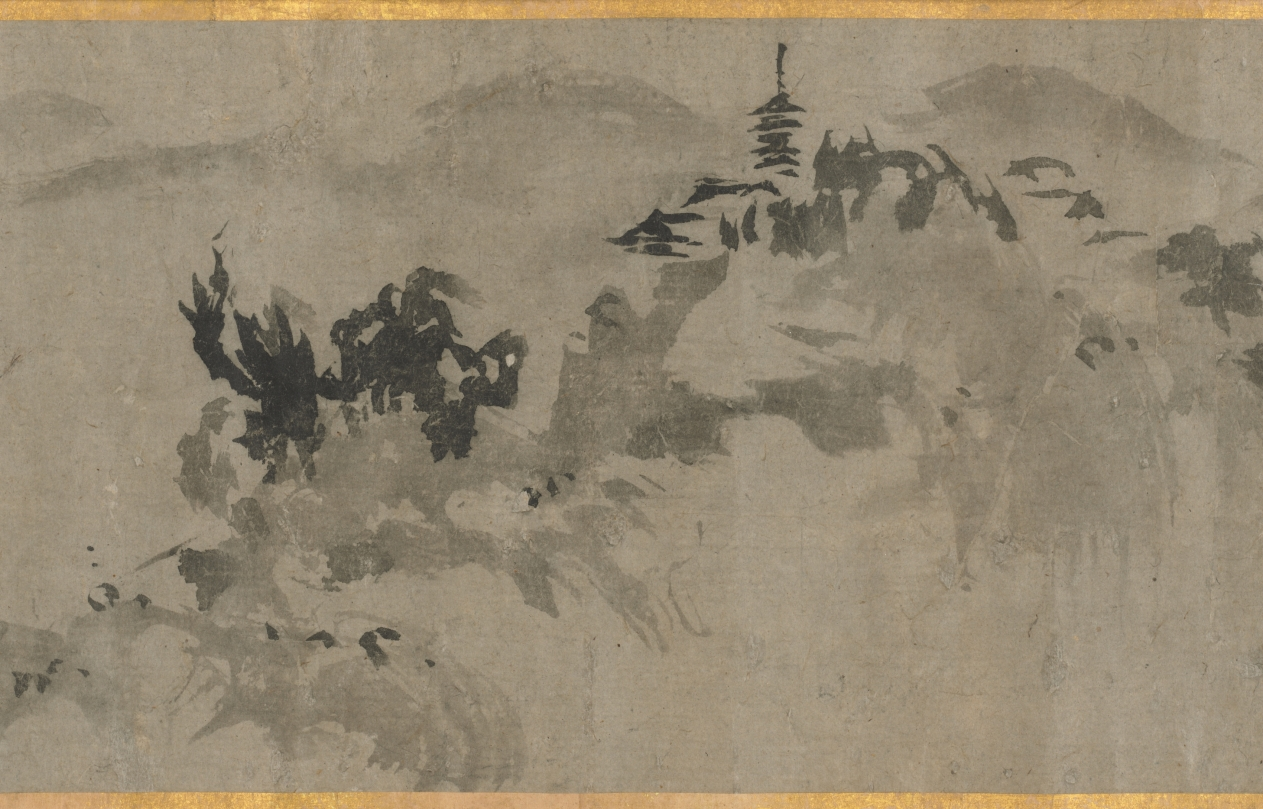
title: Eight Views of Xiao-Xiang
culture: Japan, Muromachi period (1392–1573)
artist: Sesson Shūkei (Japanese, c. 1492–c. 1577)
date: 1500s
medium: handscroll; ink on paper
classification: Painting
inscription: Signature and seal of artist at end of painting.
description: Eight Views of the Xiao and Xiang Rivers can be traced to 11th-century Chinese poems and paintings, the depiction of which had also become popular among Korean and Japanese painters. Xiao-Xiang refers to the region in present-day Hunan province where the Xiao and Xiang rivers converge. Few painters of the Eight Views had in fact seen the scenery; rather, they were trying to portray in ink and wash the lyrical qualities of dim light and a misty atmosphere typical of that region. Each of the poetic titles suggests a time of day, a season, or specific atmospheric conditions—subjects that challenged the abilities of the most talented artists. In this miniature painting (shukuzu) of the Muromachi period, Japanese Zen monk and painter Shukei Sesson depicted all eight views featured in Chinese prototypes: Wild Geese Descending to Sandbar; Returning Sails Off a Distant Coast; Mountain Market in Clearing Mist; River and Sky in Evening Snow; Autumn Moon over Dongting Lake; Night Rain on the Xiao and Xiang; Evening Bell from Mist-Shrouded Temple; and Fishing Village in Evening Glow.